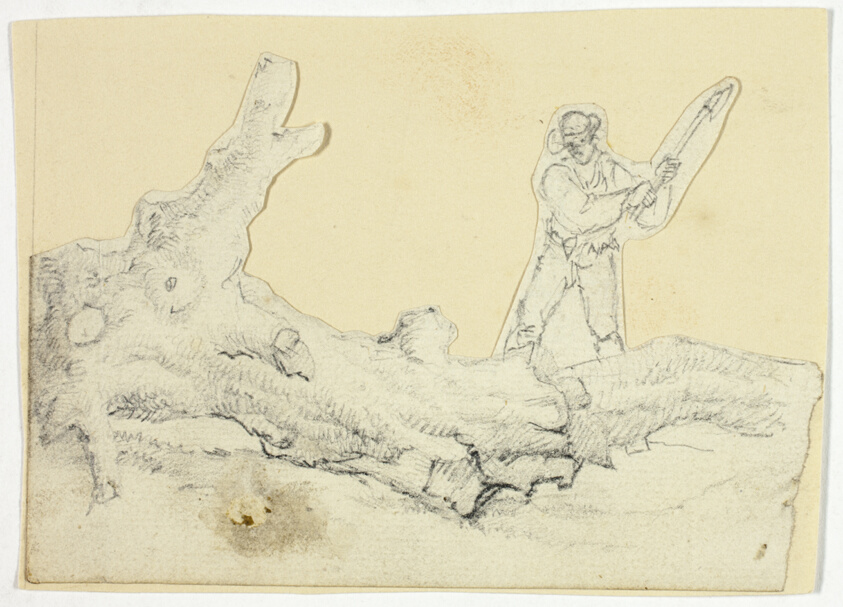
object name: Drawing and Watercolor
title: Woodsman Axing Fallen Tree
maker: William Henry Pyne (English, 1769-1843)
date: .d.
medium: Graphite on ivory laid paper, tipped onto cream wove paper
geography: England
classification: graphite; drawings (visual works); prints and drawing